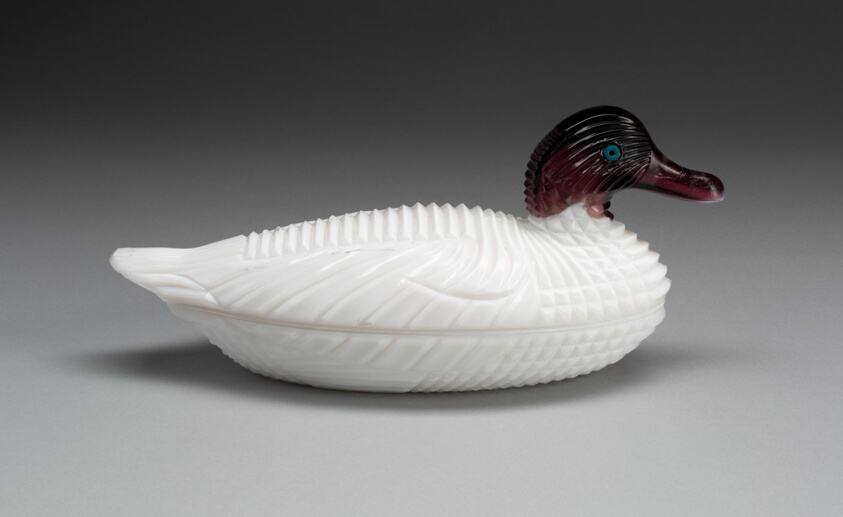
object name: Glass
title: Covered Dish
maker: Thomas Bakewell for Atterbury Glass Co.; Pittsburgh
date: 1887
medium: Glass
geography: Sandwich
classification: dish (vessel); glass; american decorative arts; american arts; decorative arts